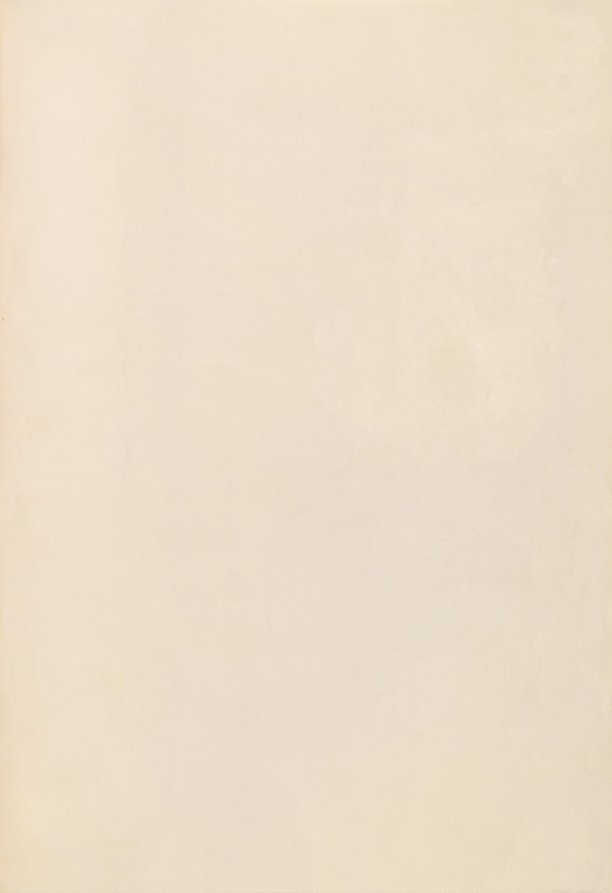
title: Hours of Queen Isabella the Catholic, Queen of Spain: Fol. 280r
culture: Flanders, Ghent and Bruges, late 15th century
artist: Master of the First Prayerbook of Maximillian (Flemish, c. 1444–1519)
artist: and Associates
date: c. 1500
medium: ink, tempera, and gold on vellum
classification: Bound Volume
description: This manuscript was illuminated by a circle of at least five highly organized manuscript painters active in the Flemish cities of Ghent and Bruges. The principal illuminator was Alexander Bening, who painted the majority of the book's miniatures. Manuscripts produced by this circle of artists are renowned for the decoration of their borders, which typically feature a rich variety of realistically-painted flowers, birds, and butterflies. This prayer book, called a book of hours, was intended not for a cleric, but for the private devotions of a lay person-in this case, Isabella the Catholic, Queen of Spain (1451-1504). Isabella's coat of arms embellishes the book's frontispiece. It is unlikely that the book was commissioned by the Queen herself; rather, she probably received it as a diplomatic gift from someone courting her patronage, perhaps Cardinal Francisco Jimenez de Cisneros. A Franciscan friar, Jimenez was dependent upon Isabella for his advancement, first to the post of Queen's confessor in 1492, and then to Archbishop of Toledo in 1495.